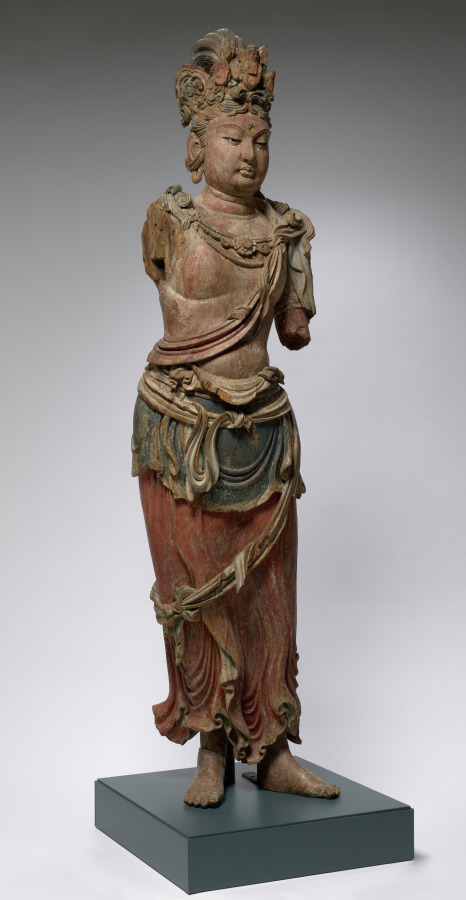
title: Eleven-Headed Guanyin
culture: China, late Northern Song dynasty (960-1127) - Jin dynasty (1115-1234)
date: 1100–1200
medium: wood with polychromy and cut gold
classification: Sculpture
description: The bodhisattva is an enlightened being dedicated to the spiritual awakening of all beings. The compassionate bodhisattva Guanyin, in a variety of manifestations, is probably the most popular deity of worship in Chinese Buddhism. In the Esoteric Buddhist form shown here, this standing Guanyin has a total of eleven heads, with smaller ones above the principal head. The uppermost head represents the Buddha Amitabha, to whom he is closely related. The eleven heads symbolize the Buddha’s steps on the path to enlightenment.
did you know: This Guanyin is carved from a single block of willow (genus Salix sp.).